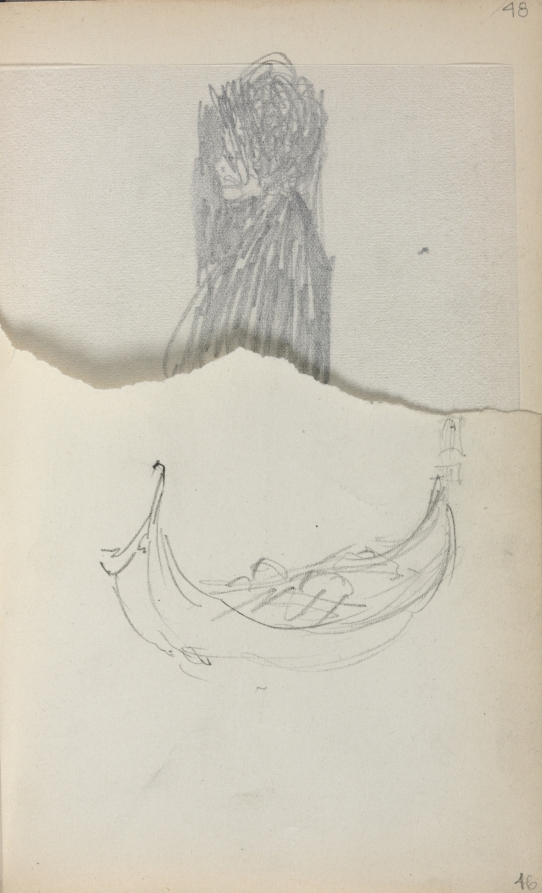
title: Italian Sketchbook: Gondola (page 46)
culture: America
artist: Maurice Prendergast (American, born Newfoundland [now Canada], 1858–1924)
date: 1898–1899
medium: pencil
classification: Bound Volume